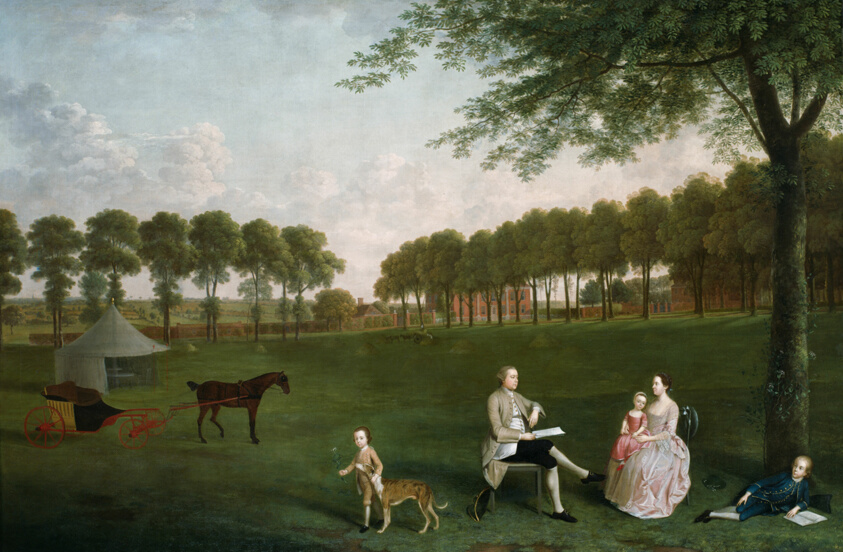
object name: Painting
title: Sir John Shaw and his Family in the Park at Eltham Lodge, Kent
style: 18th Century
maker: Arthur Devis (English, 1712–1787)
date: 1761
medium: Oil on canvas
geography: England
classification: oil on canvas; british; oil paintings (visual works); paint; painting; european painting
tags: families, nobility, luxury, leisure, wealth, animals, boys, building, buildings, carriage, children, clouds, dog, England, English, fences, field, girl, horse, house, landscape, man, park, trees, woman, woman with children